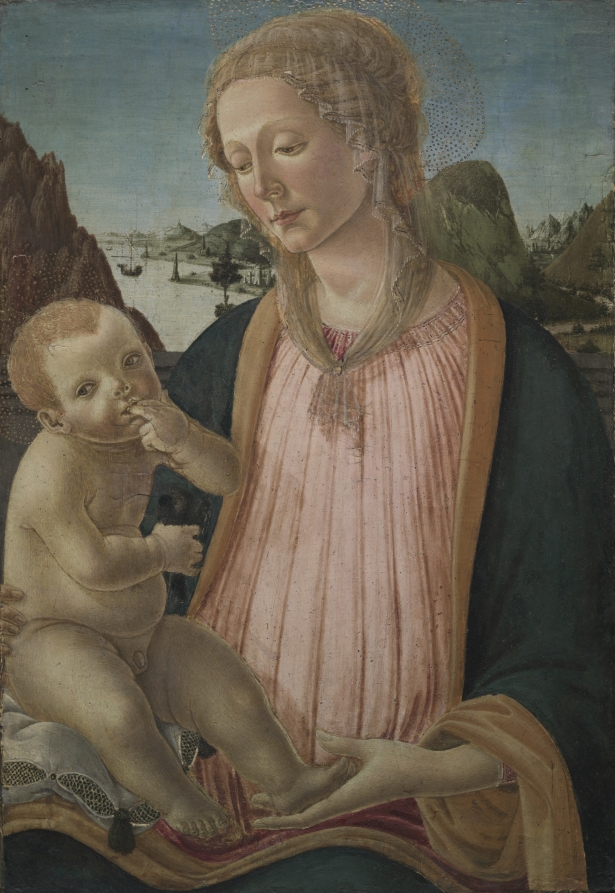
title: Madonna and Child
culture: Italy, Florence, 15th century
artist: Francesco Botticini (Italian, c. 1446–1497)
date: c. 1475–1480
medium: tempera on poplar panel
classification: Painting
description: Francesco di Giovanni Botticini came from a family of painters. His father, Giovanni di Domenico, and his son, Raffaello, were also painters. Little is known of his life or career. He is believed to have apprenticed under Neri de Bicci. The earliest dated altarpiece by his hand is 1471 (now in the Musée Jacquemart-André, Paris).